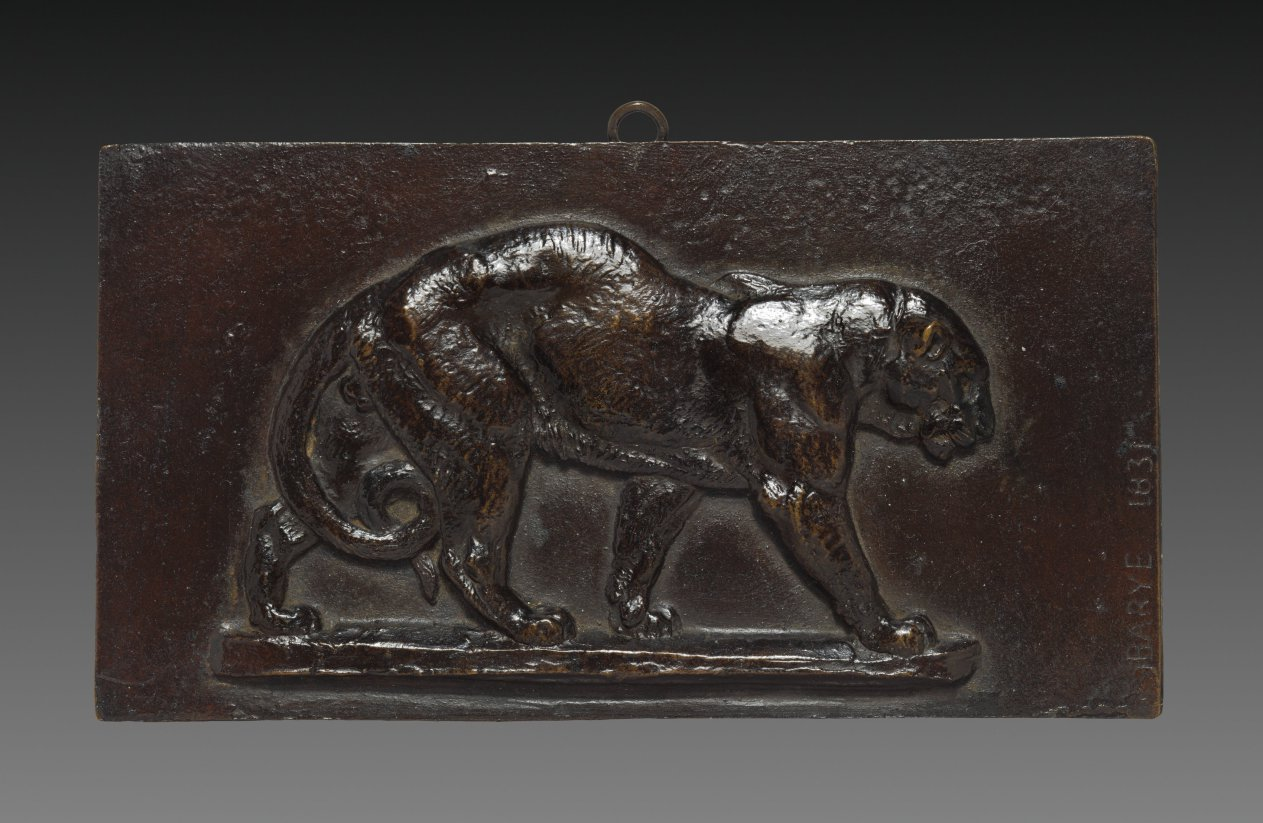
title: Walking Panther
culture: France, 19th century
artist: Antoine-Louis Barye (French, 1796–1875)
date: 1831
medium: bronze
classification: Sculpture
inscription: Inscribed right edge: "BARYE 1831"